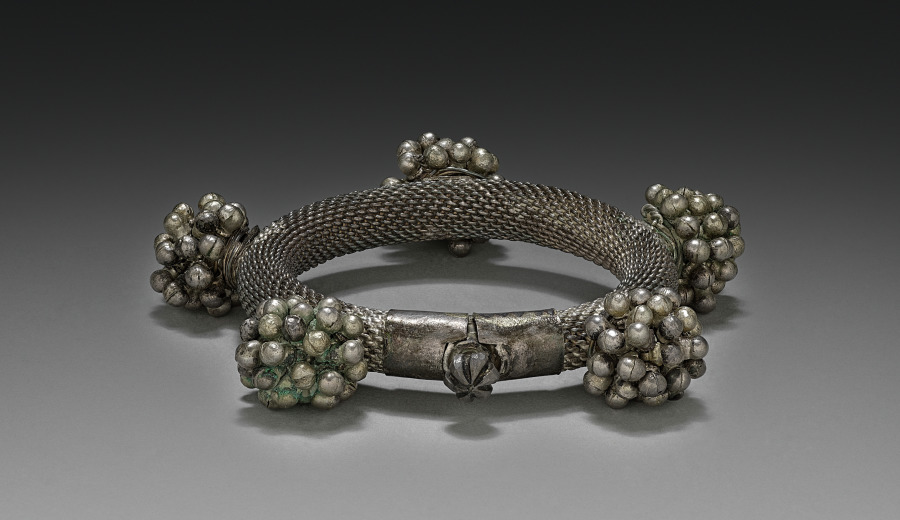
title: Bracelet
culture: India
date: early 1900s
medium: silver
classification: Jewelry